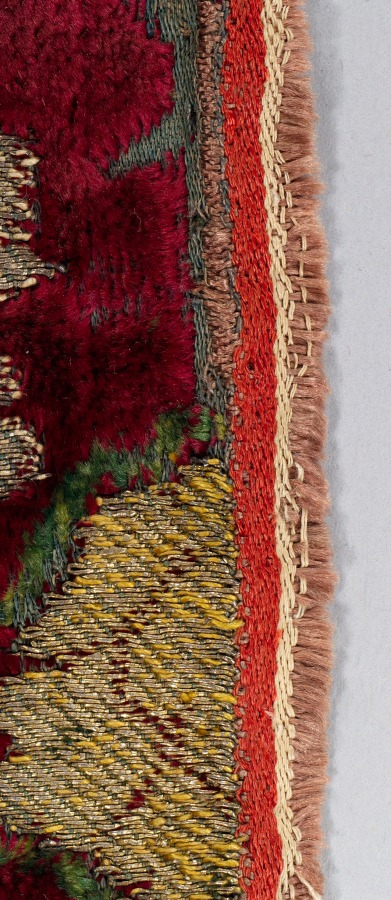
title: Brocaded Velvet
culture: Turkey, early 16th Century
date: c. 1500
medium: velvet: silk, brocaded with gold and silver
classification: Velvet